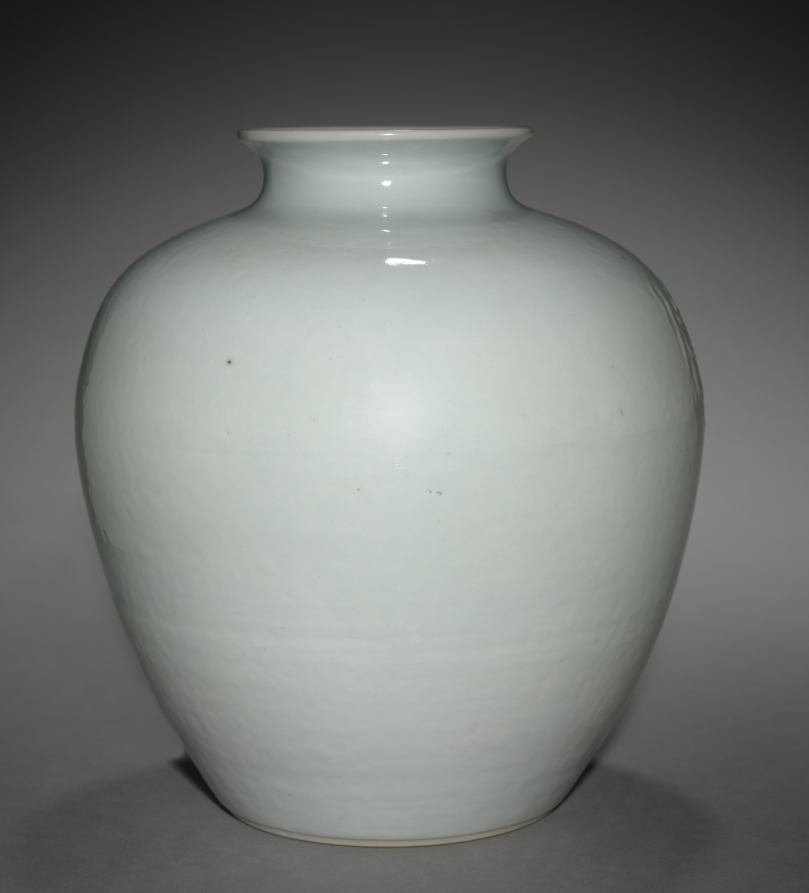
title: Jar with Crane and Willow in Relief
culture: China, Jiangxi Province, Jingdezhen kilns, Qing dynasty (1644–1911)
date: 1700s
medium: porcelain with raised and overglaze enamel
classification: Ceramic